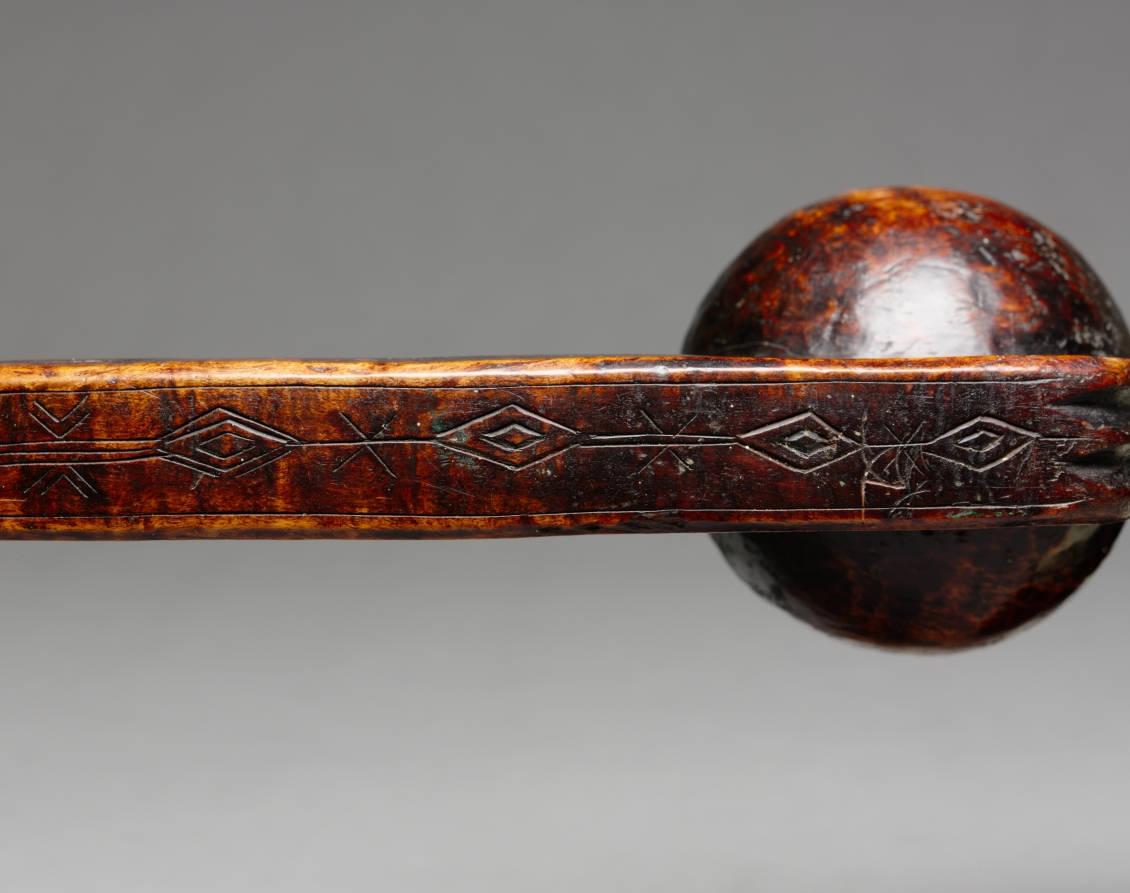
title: Ball-Headed War Club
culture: Native North America, Northeastern Woodlands, Great Lakes, Anishinaabe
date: late 1700s–early 1800s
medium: wood (maple?)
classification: Implements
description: The ball at the striking end of this club is clenched in an abstract, jawlike form that likely refers to a protector animal who endowed the owner with power. Incised on the shaft is a rich record of doodemag (singular, doodem, “totem”)—animals representing other-than-human progenitors from which Anishinaabe peoples trace their descent. (The Anishinaabeg, a group of related Great Lakes nations, include the Odawa, Ojibwe, Potawatomi, and others.) Included is an antlered creature, perhaps a caribou, along with mammals, birds, and powerful spirit beings: the thunderbird, its wings outstretched, and perhaps the long-tailed underwater panther. When this example was made, clubs had become symbols of status and earlier ways of life, having been replaced as favored weapons by metal tomahawks and European firearms. Today, clubs are part of powwow regalia.